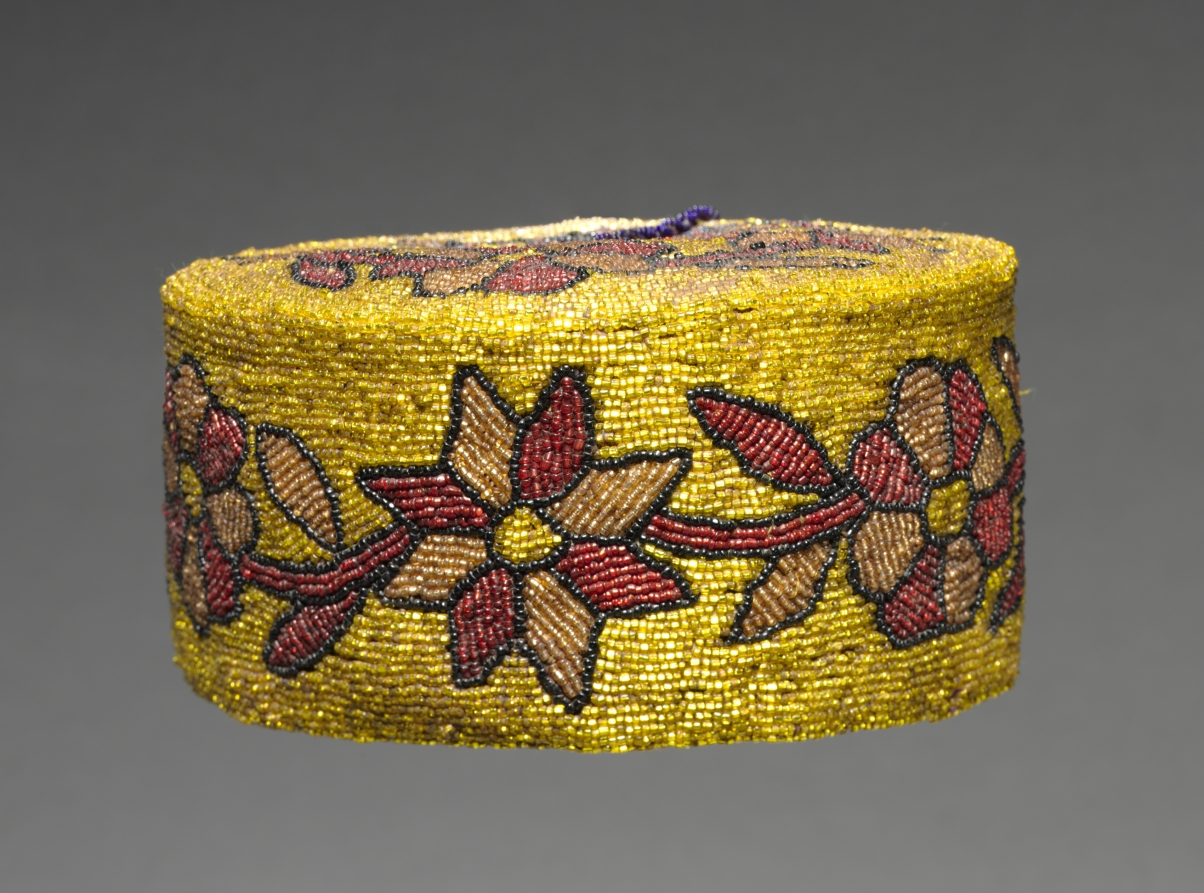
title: Coronet (oríkògbófo)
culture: Africa, West Africa, Nigeria, Yorùbá-style maker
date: 1900s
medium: Cloth, glass beads, and thread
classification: Garment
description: Like the rare conical crown (ade), the coronet (oríkògbófo) may only be worn by a king descended from Oduduwa, the first king of the Yorùbá. While the crown is reserved for special occasions, the coronet may be used by the king for less formal public events and when entertaining non-Yorùbá visitors. It signifies wealth rather than royal status.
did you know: The beads on this sculpture were imported, likely from Venice or Bohemia (now called the Czech Republic).